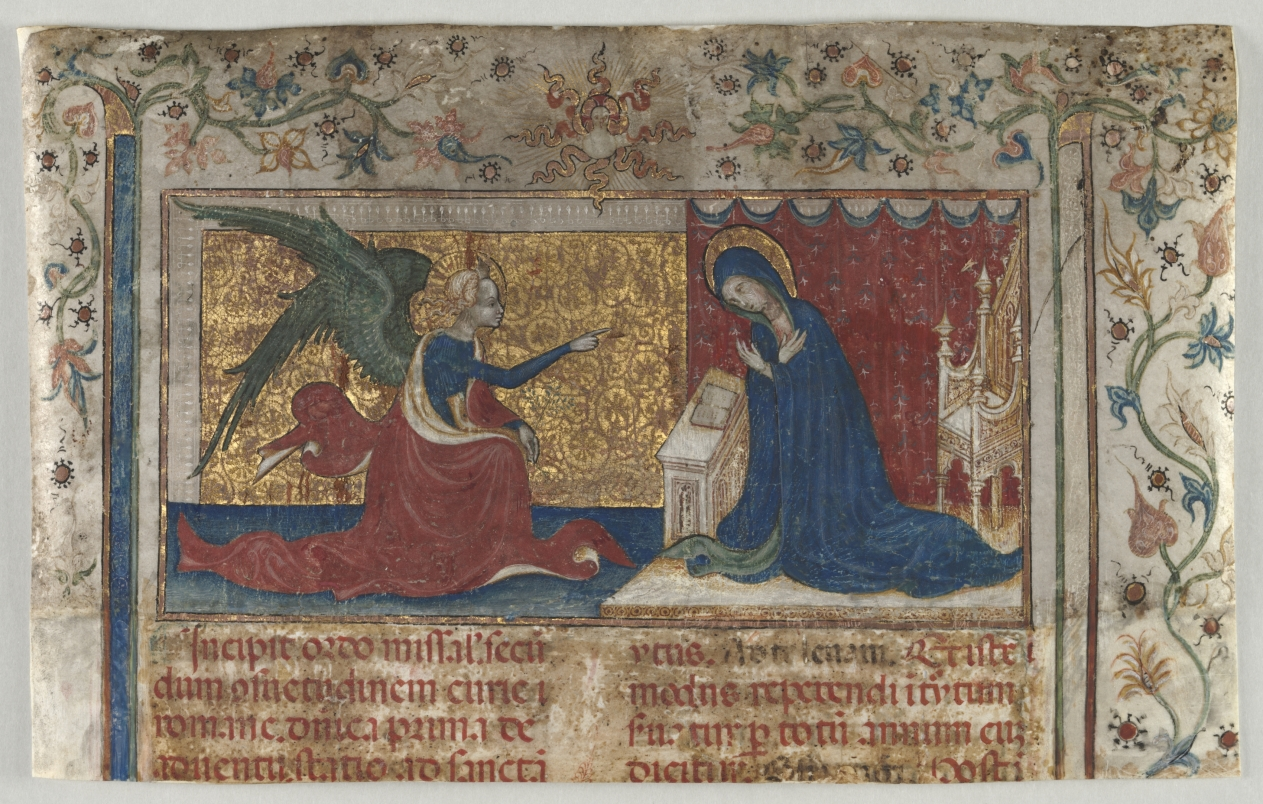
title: Half Leaf from a Missal: The Annunciation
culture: France, Avignon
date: c. 1415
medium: ink, tempera, and gold on parchment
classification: Manuscript